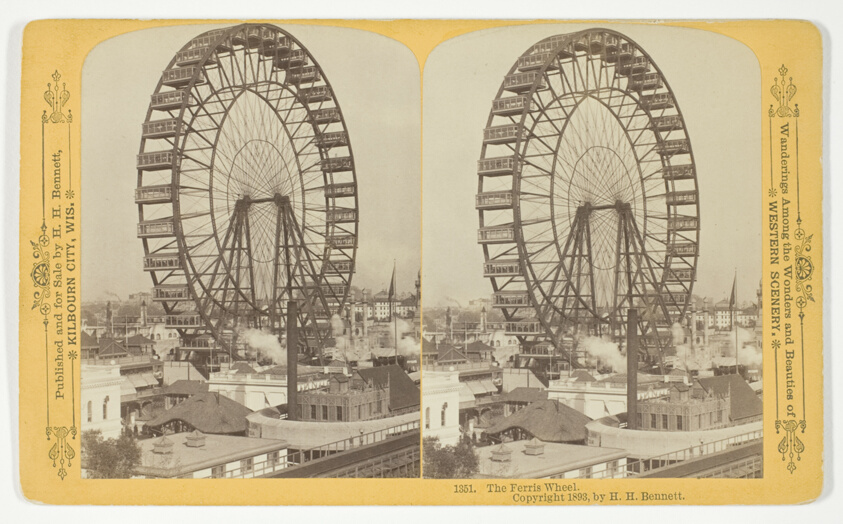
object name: Photograph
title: The Ferris Wheel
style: 19th century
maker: Henry Hamilton Bennett (American, born Canada, 1843-1908)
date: 1893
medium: Albumen print, stereo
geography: Chicago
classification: photography; photograph; albumen silver print; stereograph (albumen)